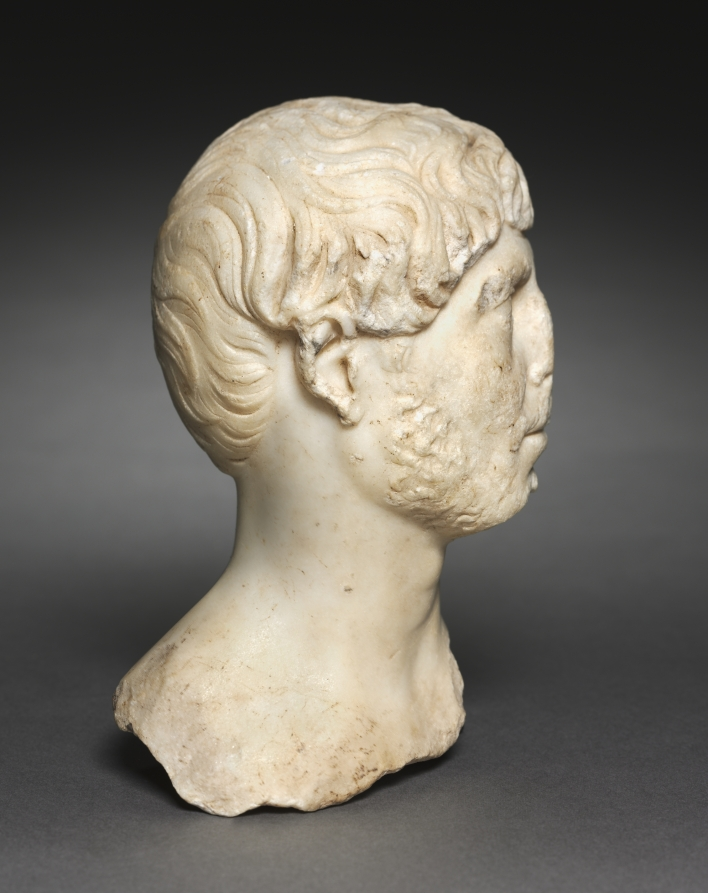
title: Head of a Bearded Man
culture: Italy, Roman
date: c. 125 CE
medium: marble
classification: Sculpture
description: This small-scale portrait depicts a bearded man turned toward his left. His close-cropped hair is combed forward in artful waves, echoed in his short beard. While parts of the chest and shoulders have been lost, the projecting element underneath suggests this portrait was intended as a bust. Beards were uncommon in Rome until the emperor Hadrian (r. 117–38 CE) popularized them during his reign. This man’s grooming is so similar to the emperor’s that he was first thought to be Hadrian; however, the face is too angular. Wealthy and noble Romans would often depict themselves with the same styles as the imperial family.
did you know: This head was probably originally displayed against a wall or in a niche.